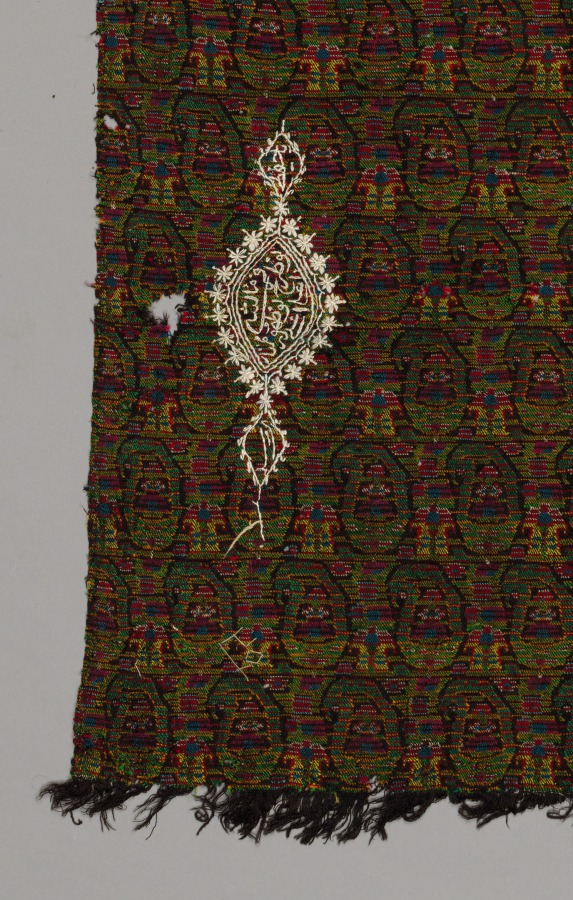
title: Shawl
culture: India, Punjab, late 19th century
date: late 1800s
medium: tapestry twill; wool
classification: Textile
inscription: Arabic inscription in left corner; may give name and/or date.